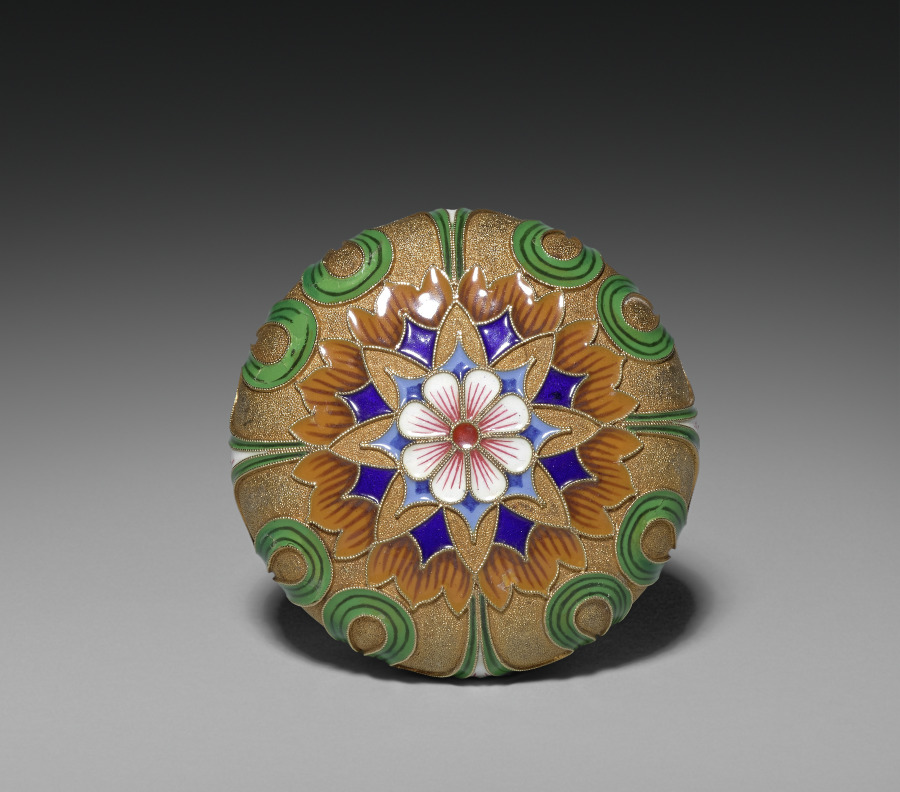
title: Cover for a Tea Caddy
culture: Russia, St. Petersburg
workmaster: attributed to Feodor Ivanovich Rückert (Russian, 1840–1917)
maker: House of Fabergé (Russian, 1842–1918)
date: 1896–1906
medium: silver gilt, opaque cloisonné enamel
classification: Miscellaneous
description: Fabergé’s craftsmen in Moscow, especially under the watchful eye of workmaster Feodor Rückert, became known for their work in the Pan-Slavic or Neo-Russian style, hearkening back to 17th-century motifs of Russian folk art. Often on rather conventional shapes, Rückert and his silversmiths created an explosion of color, achieved through the historic technique of cloisonné enamel in which tiny metal lines are soldered to the surface then filled with glass powders in various colors and fired to create a high gloss finish. The result is a spectacular evocation of the 17th-century originals. Far from mere copies, however, Rückert's designs, such as this tea service, employ naturalistic or abstract motifs in a thoroughly modern adaptation of a remarkable earlier period of Russian art and decoration.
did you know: This cover for a tea caddy is part of a larger tea service.